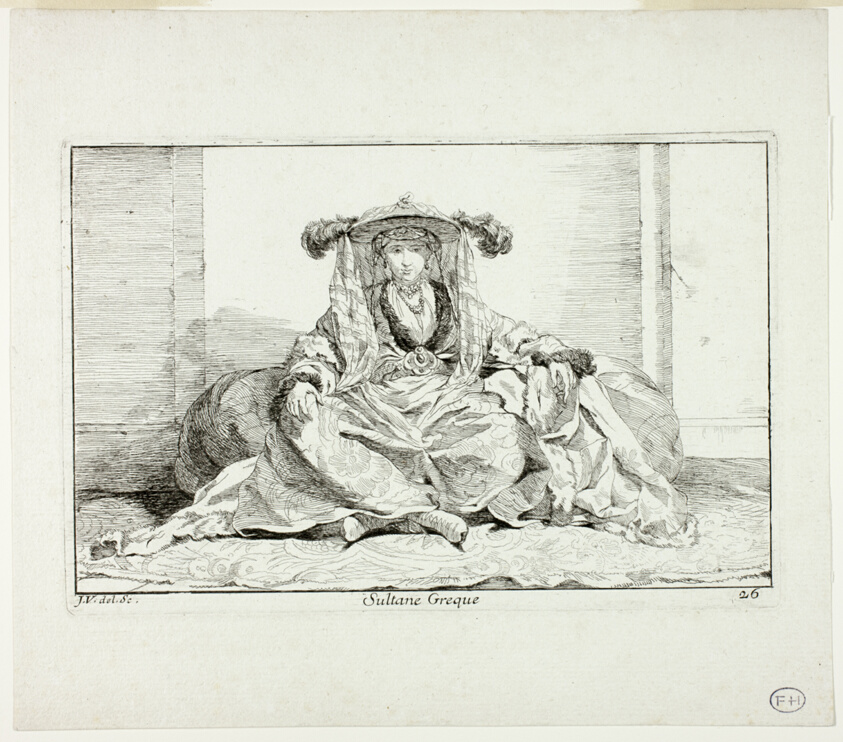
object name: Print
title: Sultane Grecque, plate 26, from Caravanne du Sultan à la Mecque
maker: Joseph-Marie Vien, the elder; French, 1716–1809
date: 1748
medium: Etching on ivory laid paper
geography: France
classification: etching; paper; print; prints and drawing